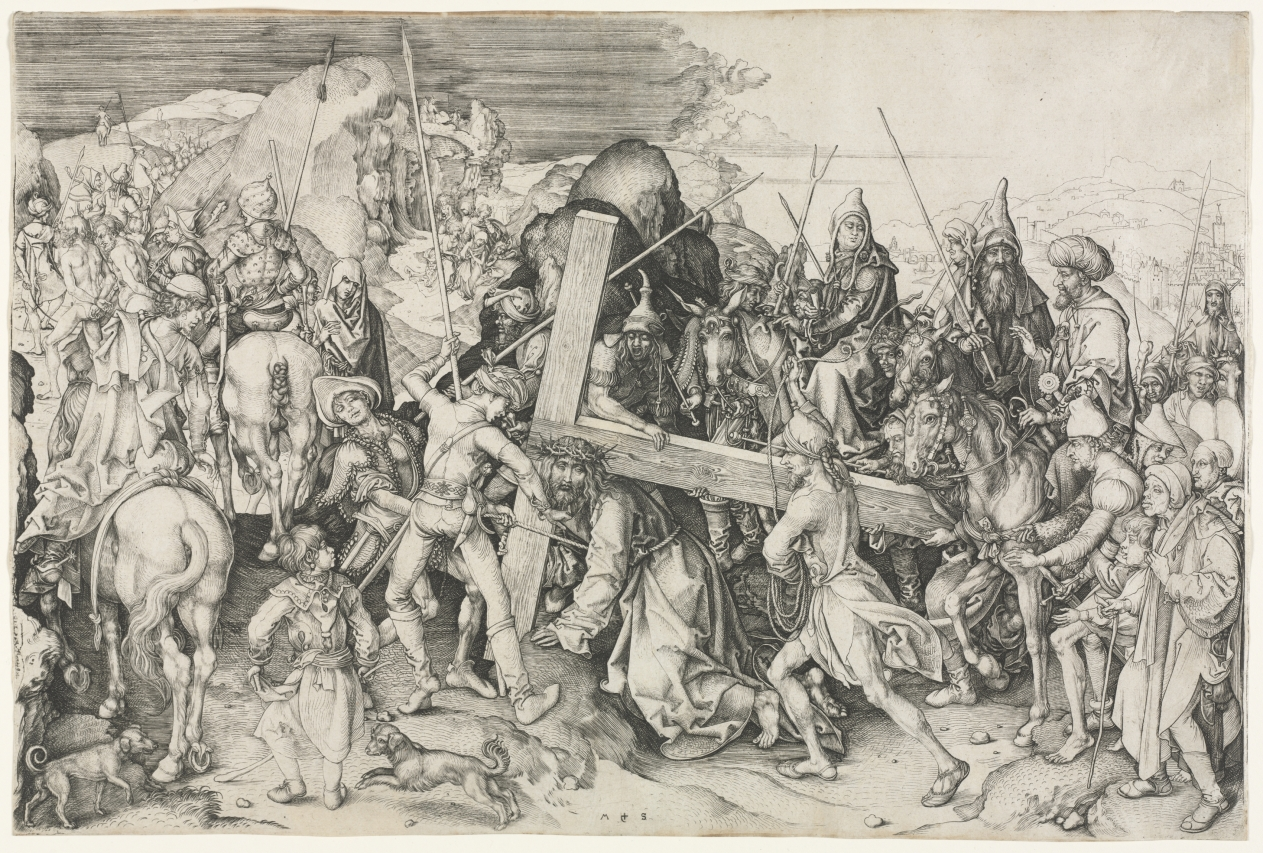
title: Christ Carrying the Cross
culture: Germany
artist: Martin Schongauer (German, c. 1450–1491)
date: 1475–90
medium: engraving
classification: Print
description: This complex engraving depicts Christ's walk to Golgotha, the site of his Crucifixion. A crowd, depicted as violent and uncaring, moves across a rocky landscape. At the center of the procession, Christ has fallen under the weight of his huge cross. Martin Schongauer made Christ's gaze the only one directly confronting and involving the viewer in his anguish. Images like this functioned as devotional tools meant to help the faithful to meditate on Christ's suffering during his trial, torture, and execution.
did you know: The large size and composition of this engraving likely emulated a painting of the same subject by the artist Jan Van Eyck, now lost and known only though copies.